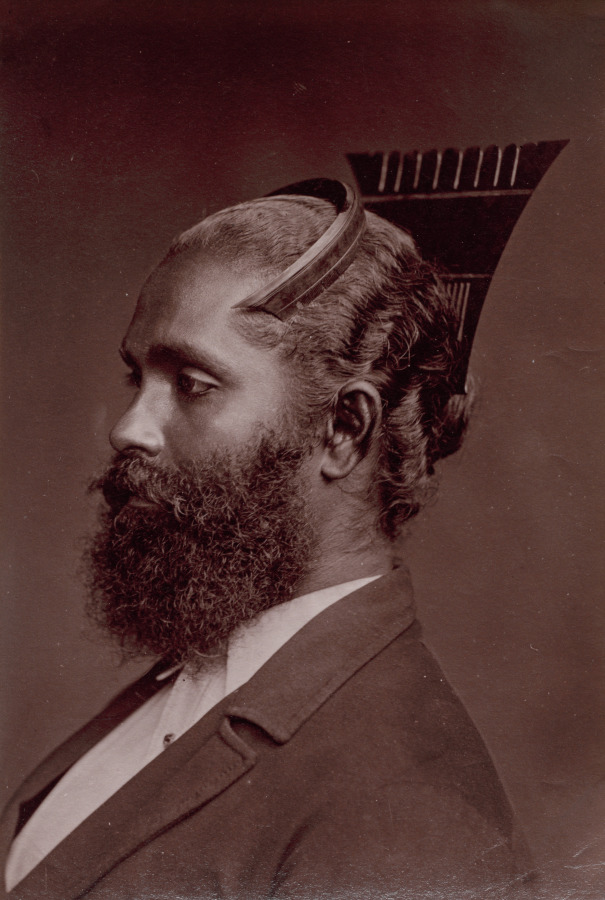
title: Sinhalese Man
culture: India, 19th century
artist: Scowen & Co. (British, active Ceylon, 1876–1895)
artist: or Skeen & Co. (British, active 1860–1920)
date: c. 1880s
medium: albumen print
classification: Photograph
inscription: Written in pencil on verso: “126”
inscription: Written in pencil on verso: “Singhalese”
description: The gentleman sports a Western jacket and shirt, but his distinctive hairstyle identifies him as Sinhalese, a people originally from northern India who now form the majority of the population of Sri Lanka.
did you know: Formally posed in a studio in profile, rather like a specimen, the image is more likely an anthropological study than a commissioned portrait.